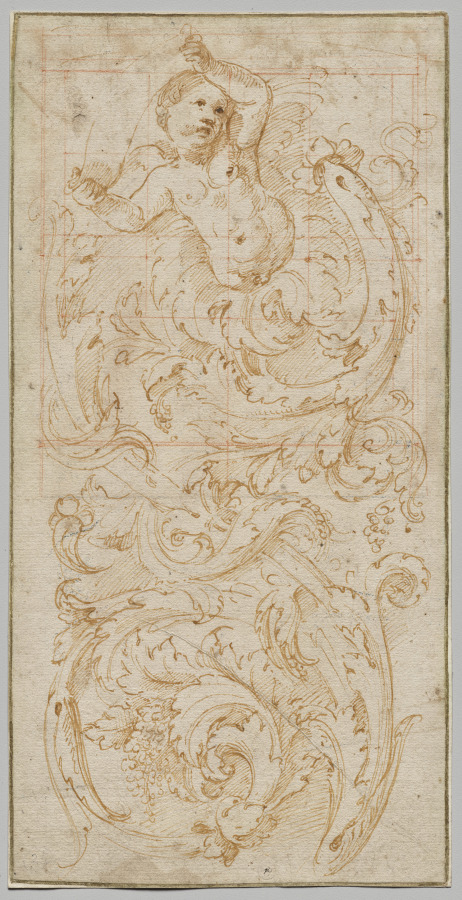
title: Design for a Frieze with a Putto and Acanthus Leaves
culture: Italy, 16th century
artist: Giulio Romano (Italian, 1492/99–1546)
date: c. 1520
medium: Pen and brown ink, red and black chalk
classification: Drawing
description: After working to fresco the papal apartments in Rome under Raphael in the 1510s, Giulio Romano became the court artist to Federico II Gonzaga, 1st Duke of Mantua (r. 1530–40), where his universal talents as an architect, designer, and painter transformed the duke’s unadorned Palazzo del Te into an elaborate setting for leisure and courtly activity. It was through drawings that Giulio planned everything from the most important narrative sequences of the palace, to the most seemingly insignificant ornamental details. This drawing—perhaps a design for a rinceaux, a frescoed decoration to the side or above a doorway—depicts Giulio’s typically inventive approach to classical ornament, with acanthus leaves that twirl together in a complex figure-eight pattern and a putto emerging from the floral center.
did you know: The squares drawn on top of the design of this drawing indicate that it was transferred and resized to another medium such as fresco.